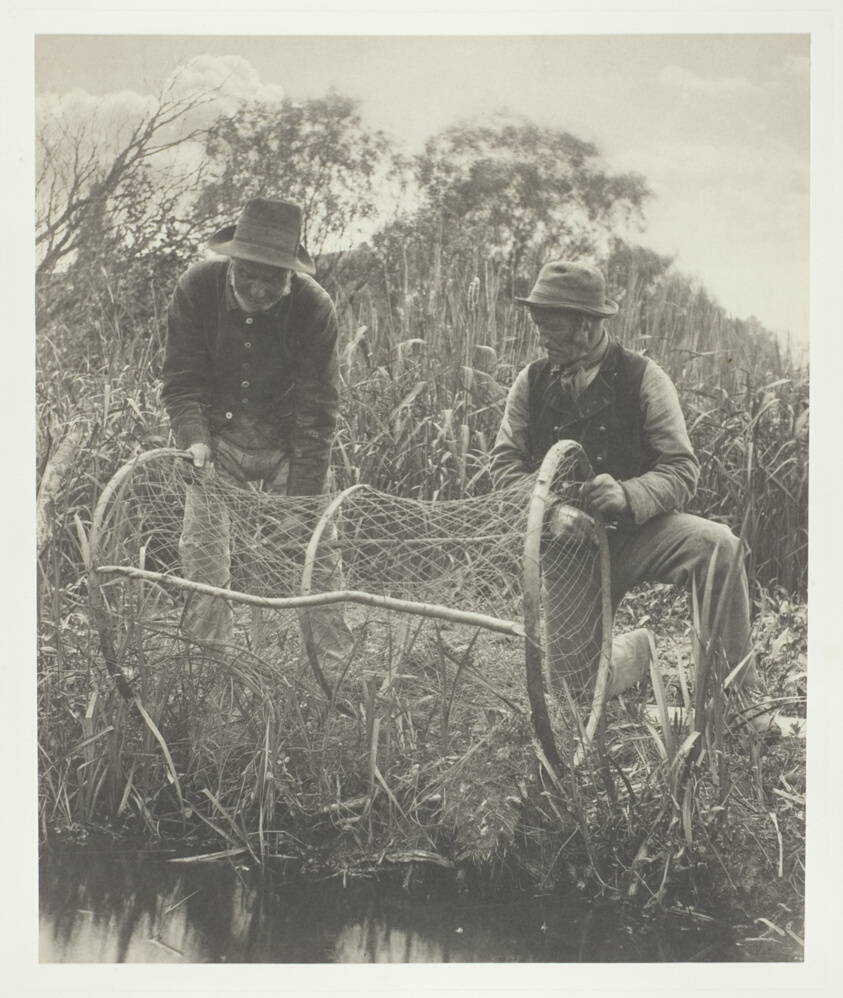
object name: Photograph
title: Setting Up the Bow-Net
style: 19th century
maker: Peter Henry Emerson (English, born Cuba, 1856–1936)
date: 1886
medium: Platinum print, pl. XVIII from the album "Life and Landscape on the Norfolk Broads" (1886)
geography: England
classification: platinum print; photographic process; photography; photograph